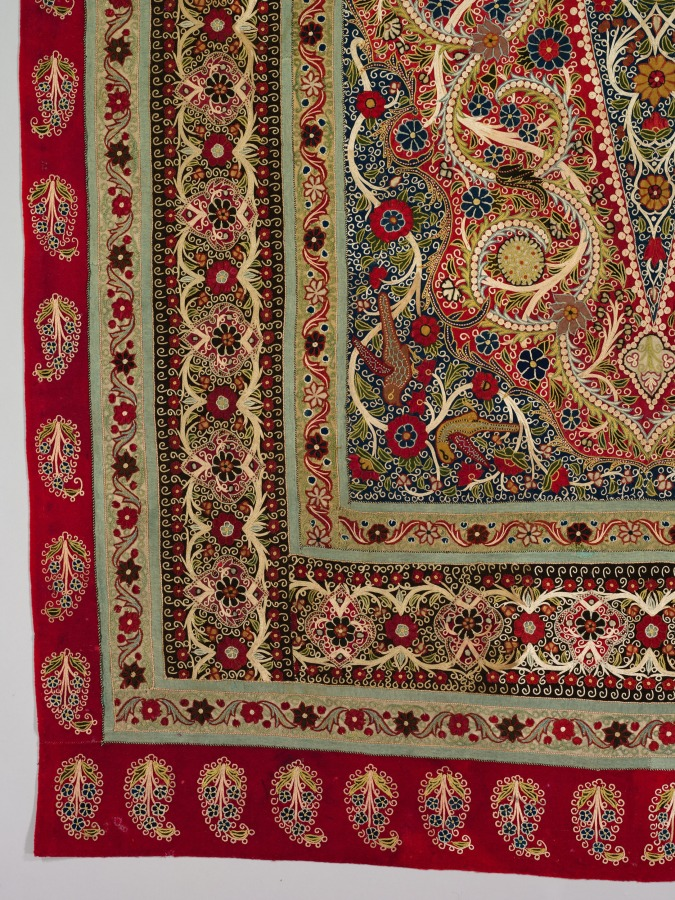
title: Tent Wall Panel(?)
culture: Iran, Rasht, Qajar period (1779-1925)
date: 1800s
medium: Wool: inlaid work; silk: embroidery, chain stitch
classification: Embroidery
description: Elaborate arched panels with multiple borders similar to this textile formed the mosaic-like interior walls of imperial tents. Here, the field is dominated by a richly decorated cypress tree above peacocks and dragon heads on an ornate foliate ground. We look upon the gardenscape through a niche (mihrab) formed by this foliage. Bright white silk “pearl” outlines, vines, and ringlets in chain-stitch embroidery enliven the pattern on contrasting colors of fulled wool. Internationally fashionable botehs, or paisleys, decorate the outer red borders.This technique has been referred to by many different names including: Rasht work, Resht work, Rashti-duzi, Rachti-douzi, embroidery applique, mosaic embroidery, piecework, patchwork, embroidery brocade, and inlaid patchwork. Many of these terms are to various degrees inaccurate descriptions of this technique. Perhaps the most practical term is Rasht work, named for the town in Iran where the technique was popularized. It begins as a ground of felted plain weave wool. Desired shapes are then punched out of the ground with a metal die and hammer. The same is done with wool of an alternating color. The edges of the different cut pieces are then embroidered together into various designs using a silk chain stitch (golab-duzi). Although this piecework technique was recorded in Iran in the 1670s, most examples survive from the 19th century, when foreigners praised them as “really [the] most beautiful embroidery.” The technique appears in furnishing fabrics, and horse covers, as well as imperial portraits, including one depicting the Qajar monarch Fath ‘Ali Shah, who ruled in 1797–1837. Sometime after leaving the workshop this panel experienced moth damage; small patches can be seen throughout.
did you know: Generally, Rasht work was made by men. Boys handled the delicate embroidering while older men designed cartoons and punched the wool designs.